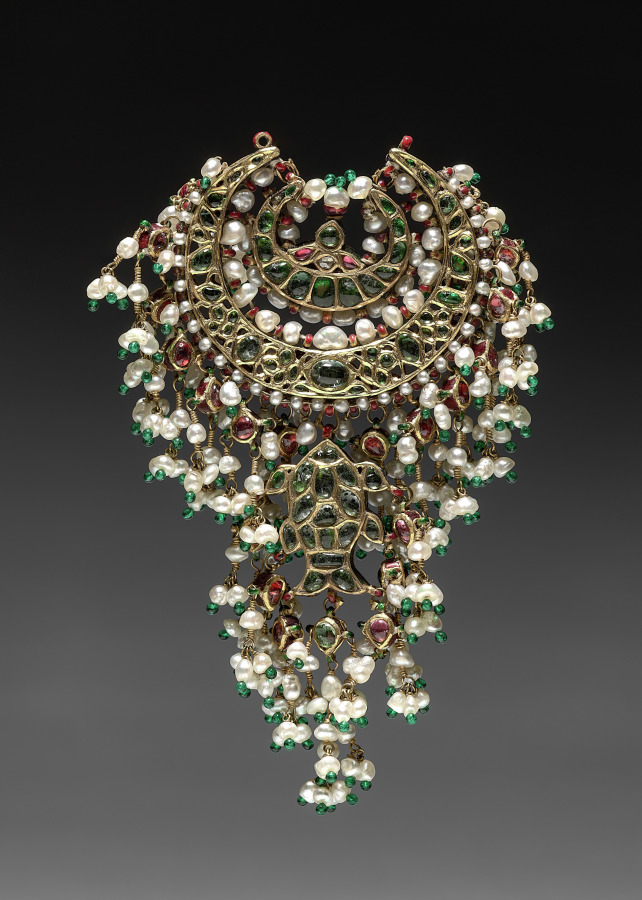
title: Pendant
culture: India, Delhi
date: 1800s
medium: Gilt silver with diamonds, emeralds, rubies, pearls, and enamel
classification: Jewelry